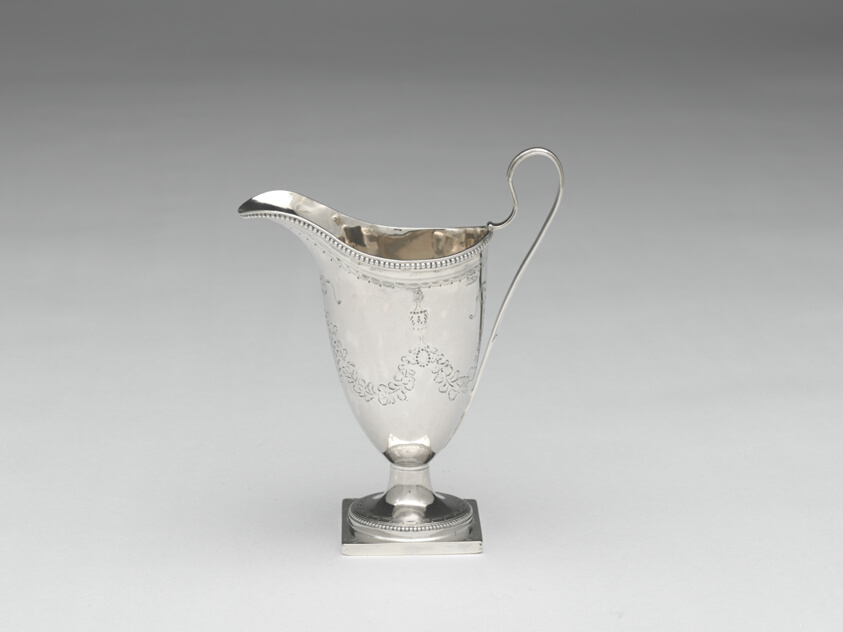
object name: Metalwork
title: Milk Pot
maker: Paul Revere Jr.; American, 1734–1818; Boston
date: 1784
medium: Silver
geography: Boston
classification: creamer; silver; american decorative arts; american arts; decorative arts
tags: dining, drinking